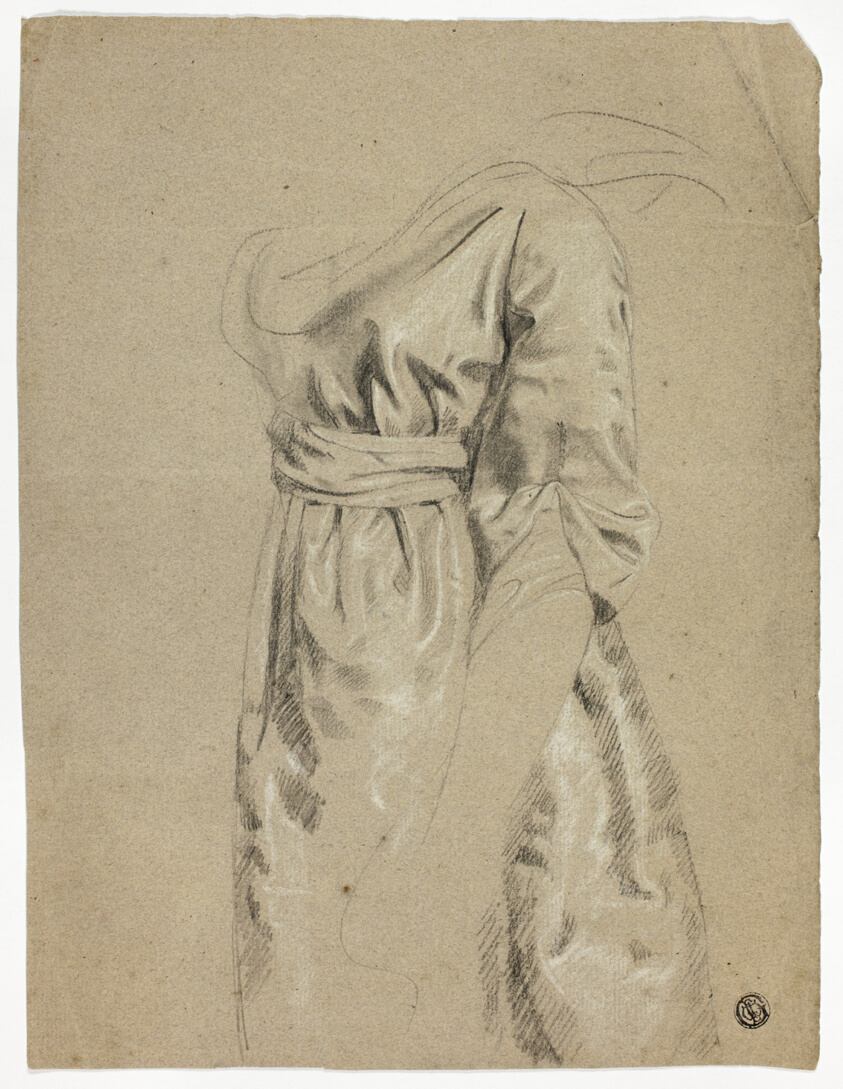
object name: Drawing and Watercolor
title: High-Waisted Gown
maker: John Downman (English, 1750-1824)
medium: Charcoal, with stumping, heightened with white chalk, on tan laid paper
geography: England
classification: charcoal; drawings (visual works); prints and drawing